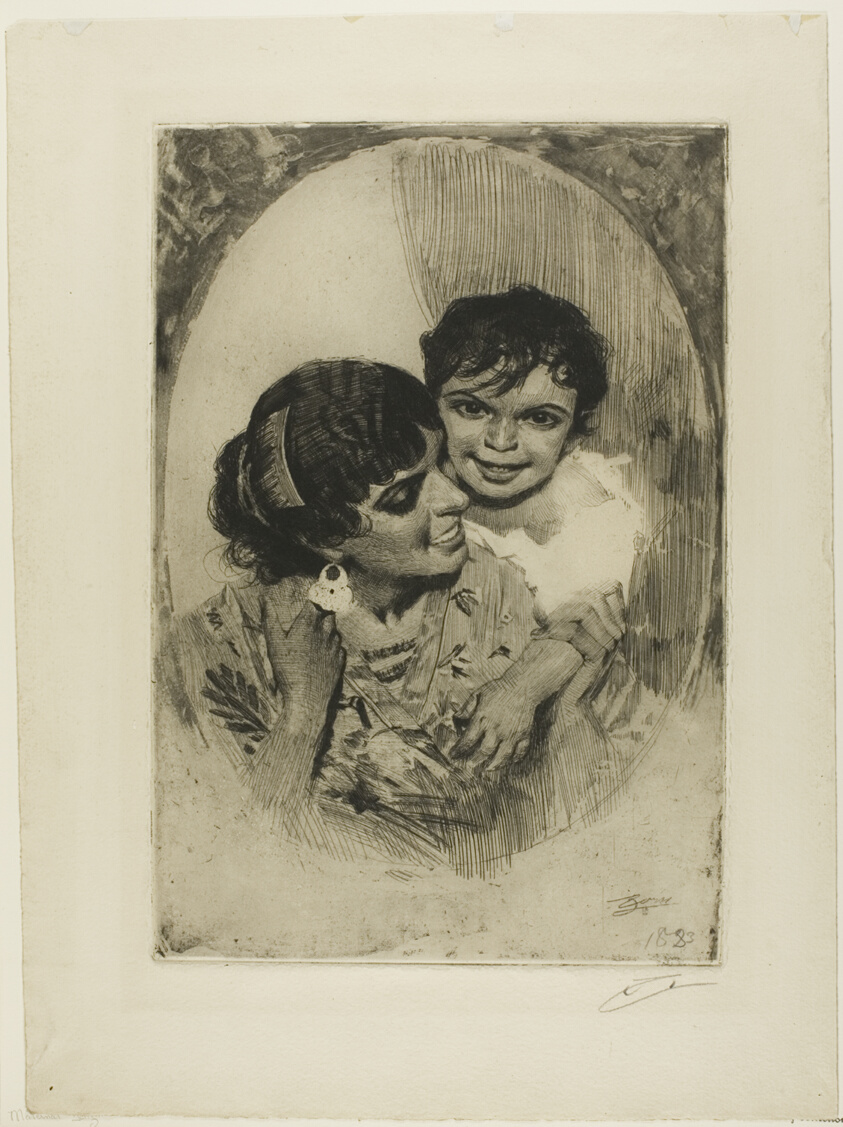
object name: Print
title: Maternal Delight III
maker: Anders Zorn (Swedish, 1860-1920)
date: 1883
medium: Etching on ivory laid paper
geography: Sweden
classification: etching; print; prints and drawing